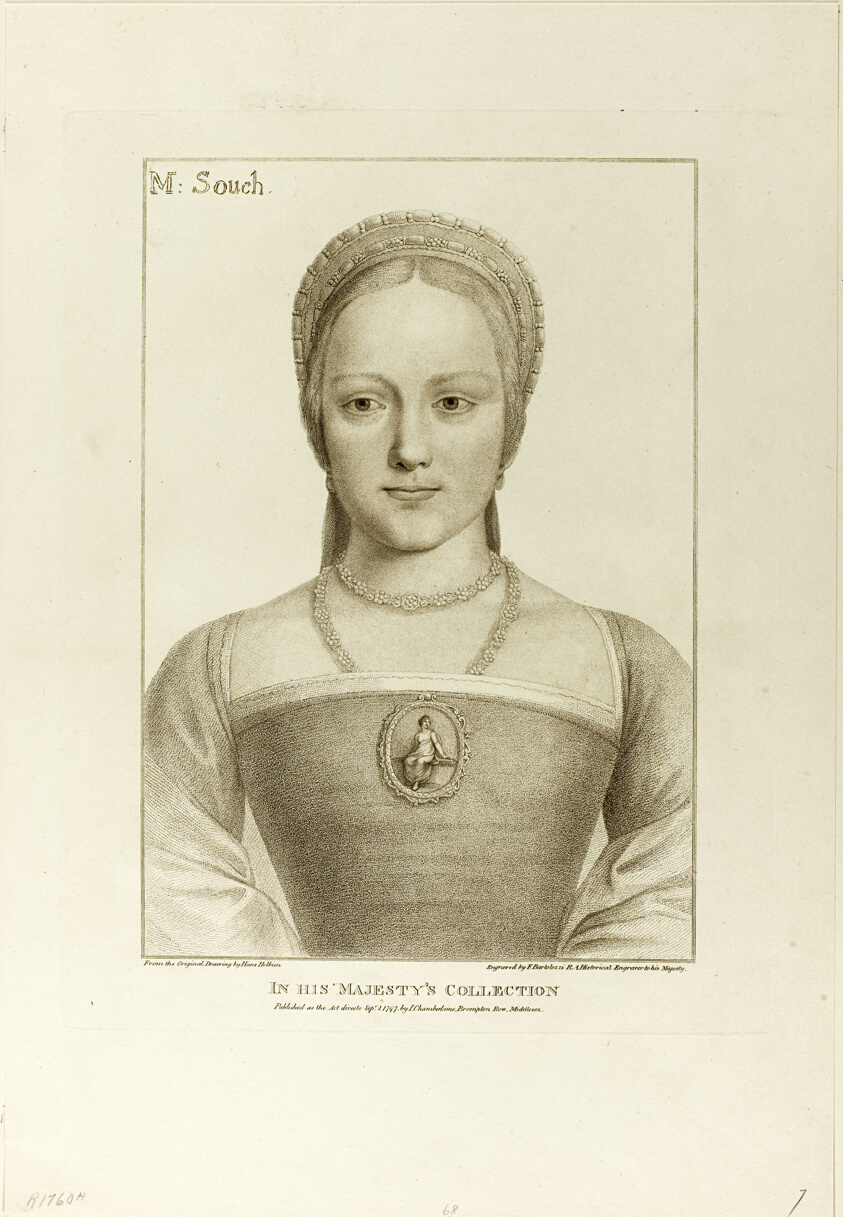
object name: Print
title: Mrs. Souch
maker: Francesco Bartolozzi (Italian, 1727-1815); after Hans Holbein the younger (German, 1497-1543)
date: September 1, 1797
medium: Stipple engraving on cream wove paper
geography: Italy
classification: engraving; print; prints and drawing